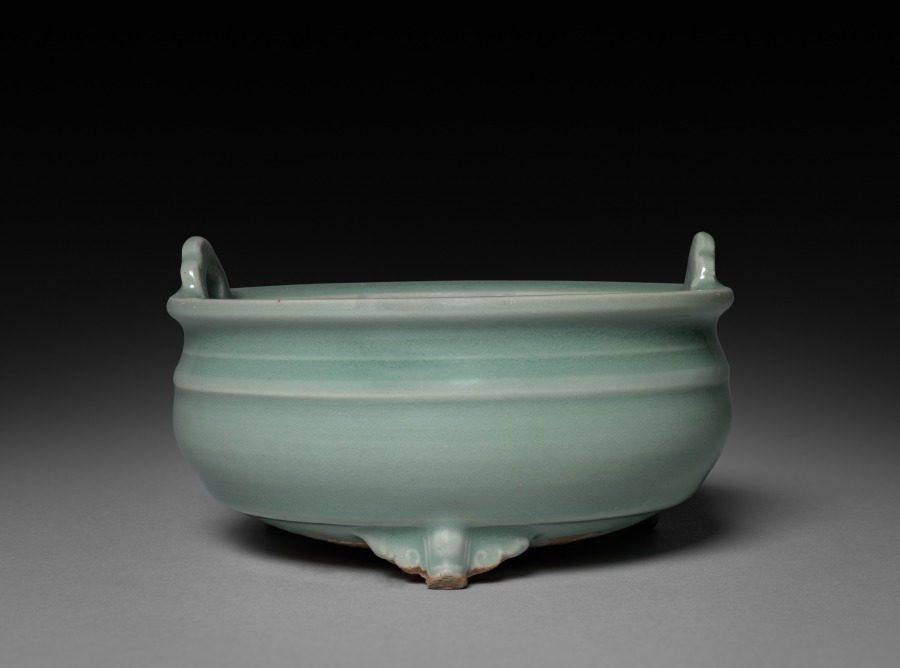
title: Incense Burner: Longquan Ware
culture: China, Southern Song dynasty (1127-1279)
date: S. Sung-Yuan Dynasty, 13th-14th Century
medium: glazed porcelain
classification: Ceramic